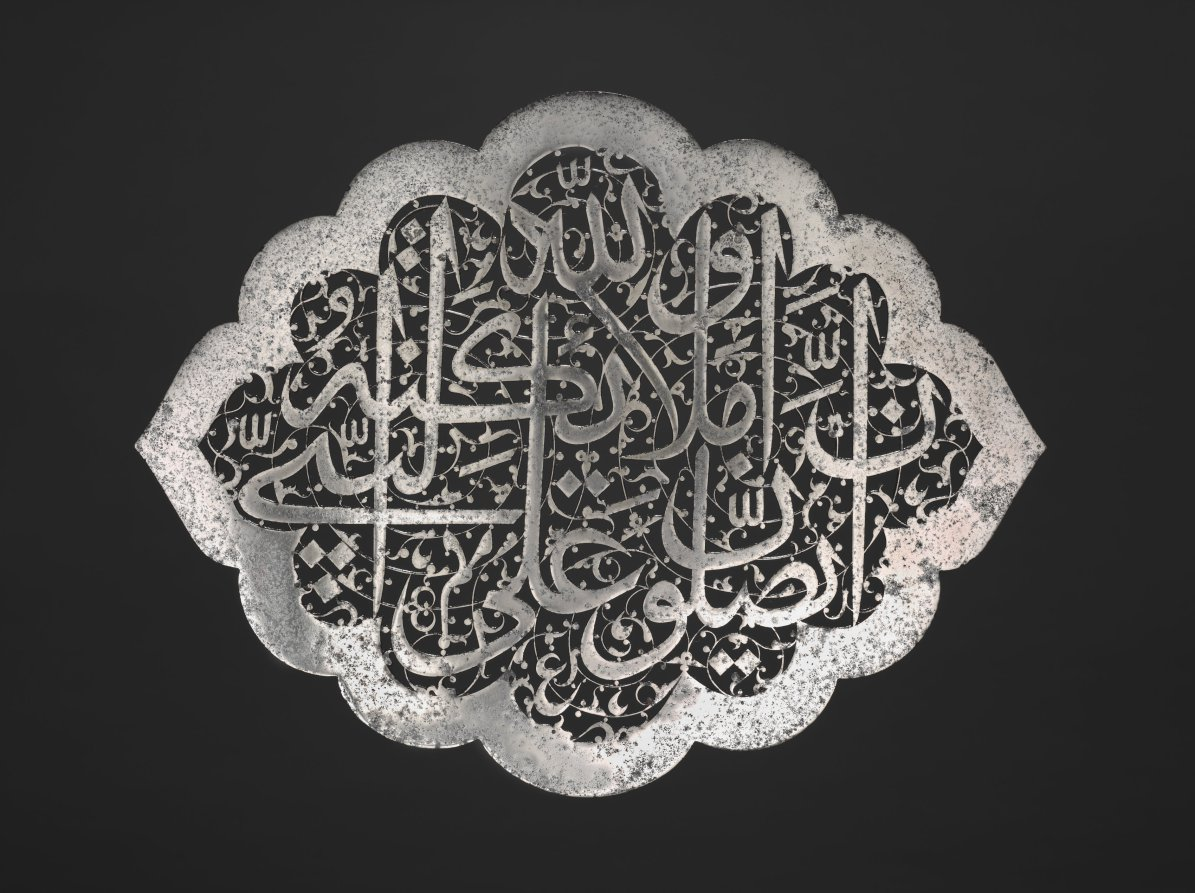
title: Inscription Plaque, Possibly from a Door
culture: Iran, Safavid period (1501–1722)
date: c. 1693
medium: forged steel, cut to shape and pierced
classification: Metalwork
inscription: Muhaqqaq, Qur'an 33:56 'Verily, God and His Angels send blessings on the Prophet'.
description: This pierced steel plaque is said to have adorned the royal tomb of Shah Suleyman II (reigned 1666–93). The Qur’anic inscription reads: “Verily, God and His Angels send blessings on the Prophet” (33:56). Steel plaques of this type required great skill to manufacture. Because of the steel’s tensile strength and durability, artists were able to create elaborate openwork plaques like this one to decorate the doors of mausolea and mosques.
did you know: Calligraphy was the supreme art form in the Islamic world.